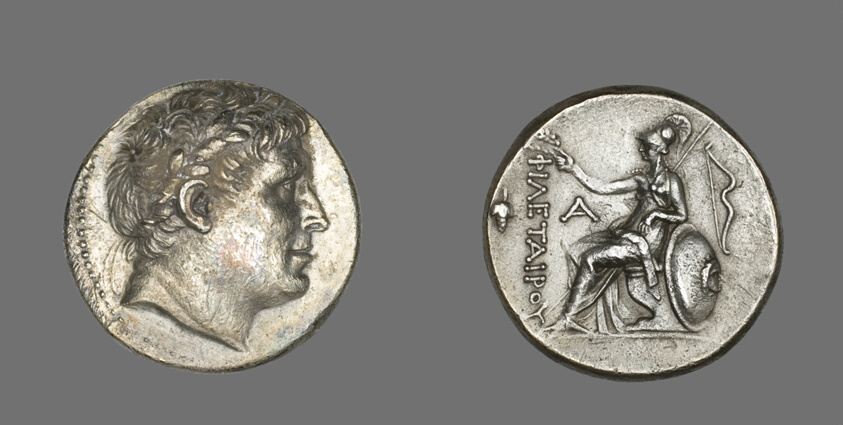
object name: Coin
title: Tetradrachm (Coin) Portraying Philetairos of Pergamon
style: hellenistic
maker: Greek; minted in Pergamon, Mysia, Asia Minor (now Turkey)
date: 241-197 BCE, Issued by Attalos I Soter Reign of Philetairos of Pergamon, 282–263 BCE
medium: Silver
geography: Bergama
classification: coin; ancient art